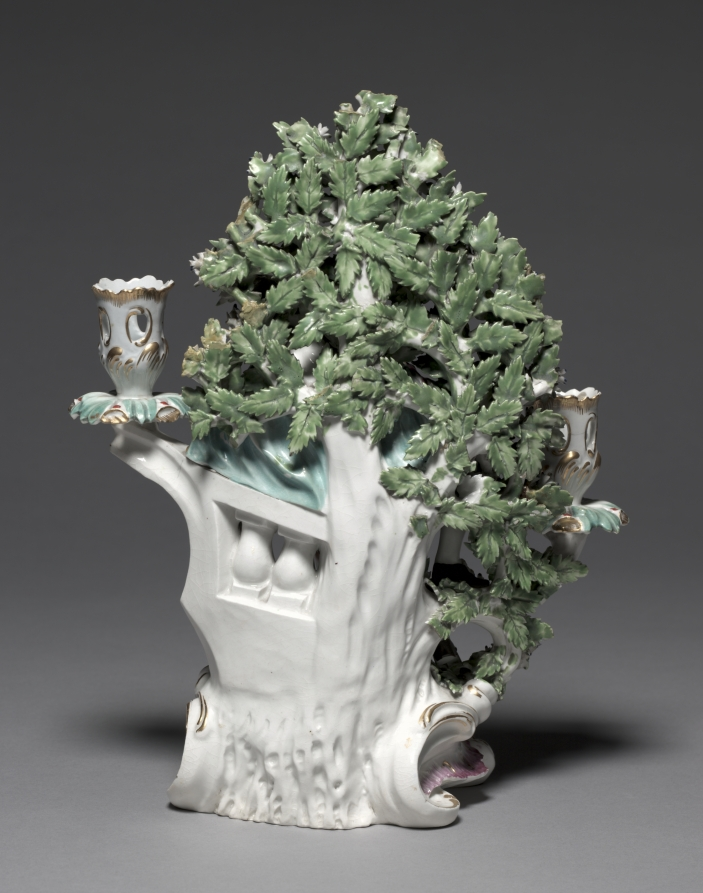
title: Candelabrum Depicting an Allegorical Figure of Liberty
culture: England, London, Chelsea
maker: Derby Porcelain Factory (Chelsea-Derby Period, 1770–84)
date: c. 1775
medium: soft-paste porcelain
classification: Ceramic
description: This allegorical figure depicts a shepherd dressed in richly patterned garments. Here the figure (Liberty) is accompanied by a dog and a bird that perches on his outstretched arm. An accompanying figure, a shepherdess (Matrimony) holds a birdcage in one hand and subtly directs the viewer’s gaze toward the sheep resting nearby with the other.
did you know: The canopy of foliage surrounding these figures was inspired by the arbors popular in theatrical stage designs during the mid-1700s.